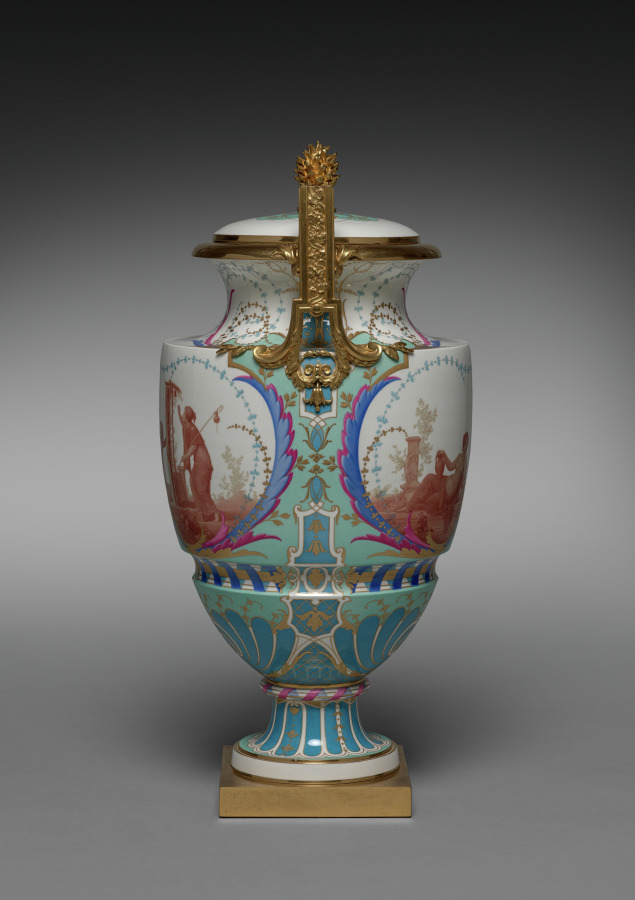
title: Vase Feuille d'Eau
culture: France, Sèvres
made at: Sèvres Porcelain Factory (French, est. 1756)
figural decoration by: Paul Marie Roussel (French, 1804–1877)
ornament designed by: Emile Renard (French)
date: 1858–62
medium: porcelain with gilt bronze mounts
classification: Ceramic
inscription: figural paintings signed obverse and reverse: "PMROUSSEL INV & PIN"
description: Feuille d'Eau means "waterleaf" and refers to the name given to the shape of this vase at the Sèvres factory. In English, waterleaf is the common name for a plant with bell-shaped flowers. The term is also applied to a stylized plant motif used in Graeco-Roman ornament. This vase was exhibited by the Sèvres firm at the International Exhibition held in London in 1862.